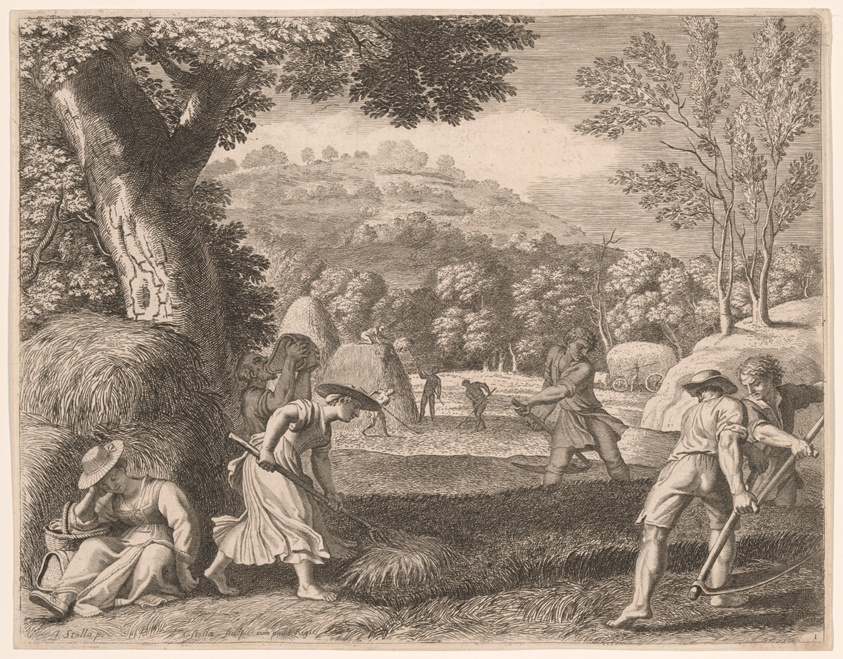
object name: Print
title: Haymaking, Plate 1 from Pastorales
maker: Claudine Bouzonnet-Stella (French, 1636–1697); after Jacques Stella (French, 1596-1657)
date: 1667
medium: Etching in black on cream laid paper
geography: France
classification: prints and drawing; paper; etching; print